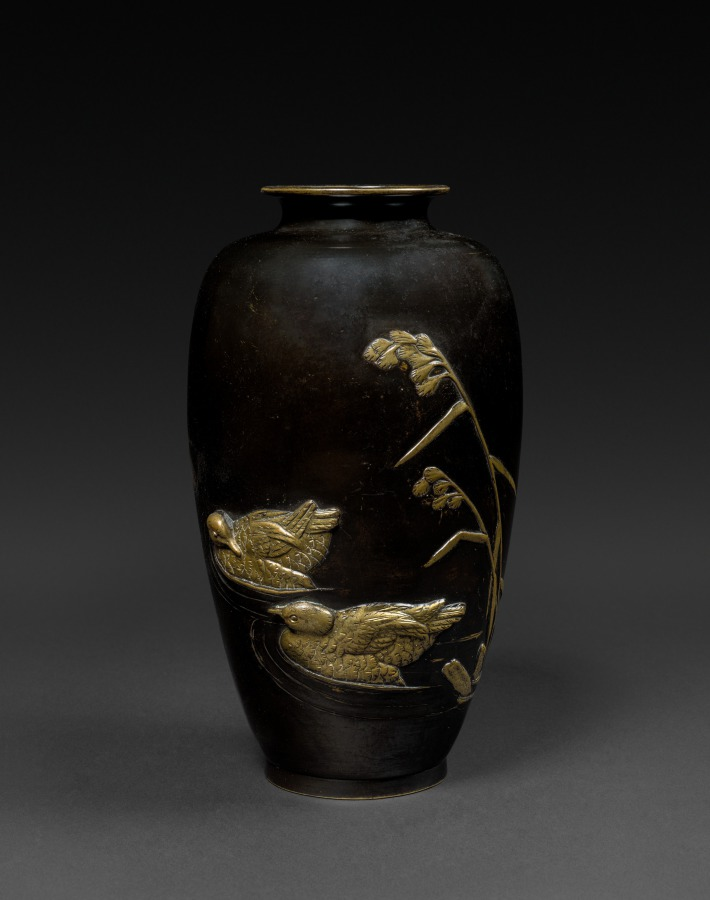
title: Bas relief Vase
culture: Japan, Meiji period (1868–1912)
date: c 1880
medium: bronze, gilding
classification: Metalwork